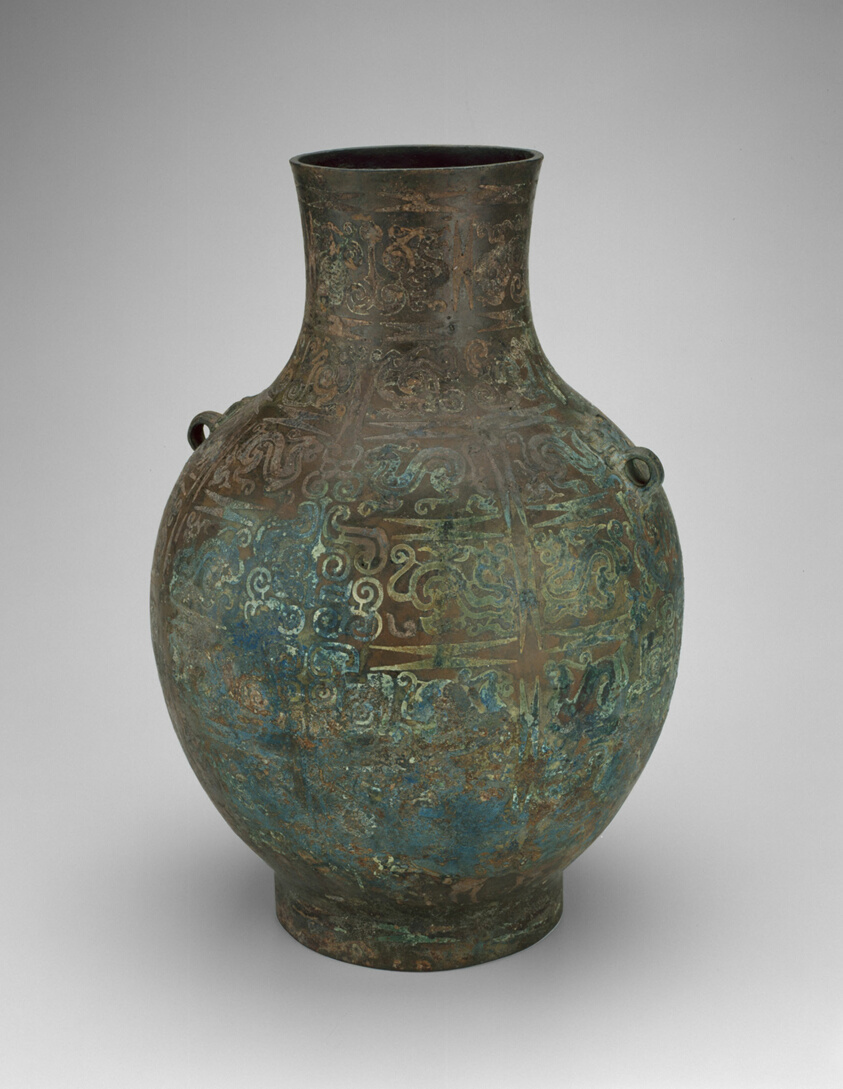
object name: Vessel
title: Jar (hu)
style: Chinese (culture or style)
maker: China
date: Eastern Zhou dynasty, Warring States period (475–221 B.C.)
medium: Bronze inlaid with copper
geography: China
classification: bronze; metal; vessel; asian art